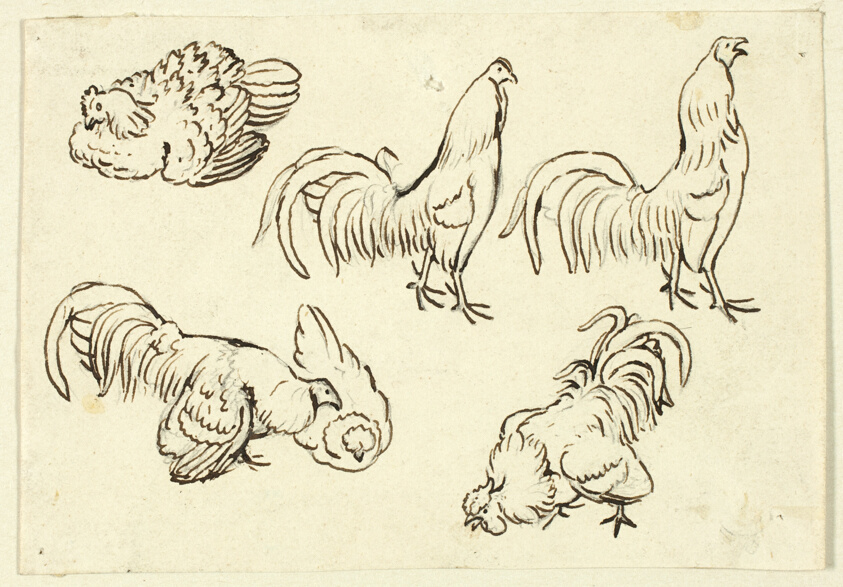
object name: Drawing and Watercolor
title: Sketches of Poultry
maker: Attributed to Henry Stacy Marks; English, 1829-1898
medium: Pen and brown ink over graphite on cream wove paper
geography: England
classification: pen and ink drawings; drawings (visual works); prints and drawing